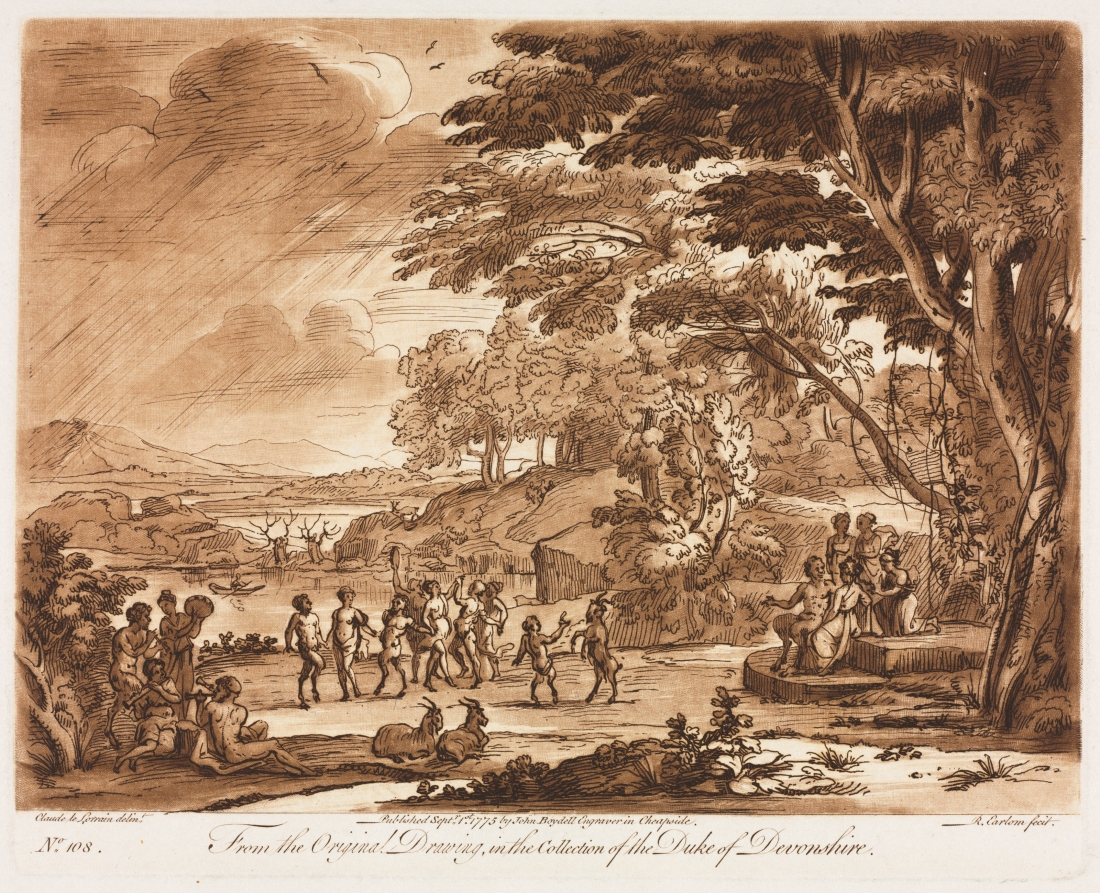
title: Liber Veritatis: No. 108, Landscape with Satyrs and Nymphs Dancing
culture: England, 18th century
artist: Richard Earlom (British, 1743–1822)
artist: after Claude Lorrain (French, 1604–1682)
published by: John Boydell (British, 1720–1804)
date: 1775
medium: etching and mezzotint printed in brown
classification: Print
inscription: inscribed lower margin in plate: From the Original Drawing, in the collection of the Duke of Devonshire